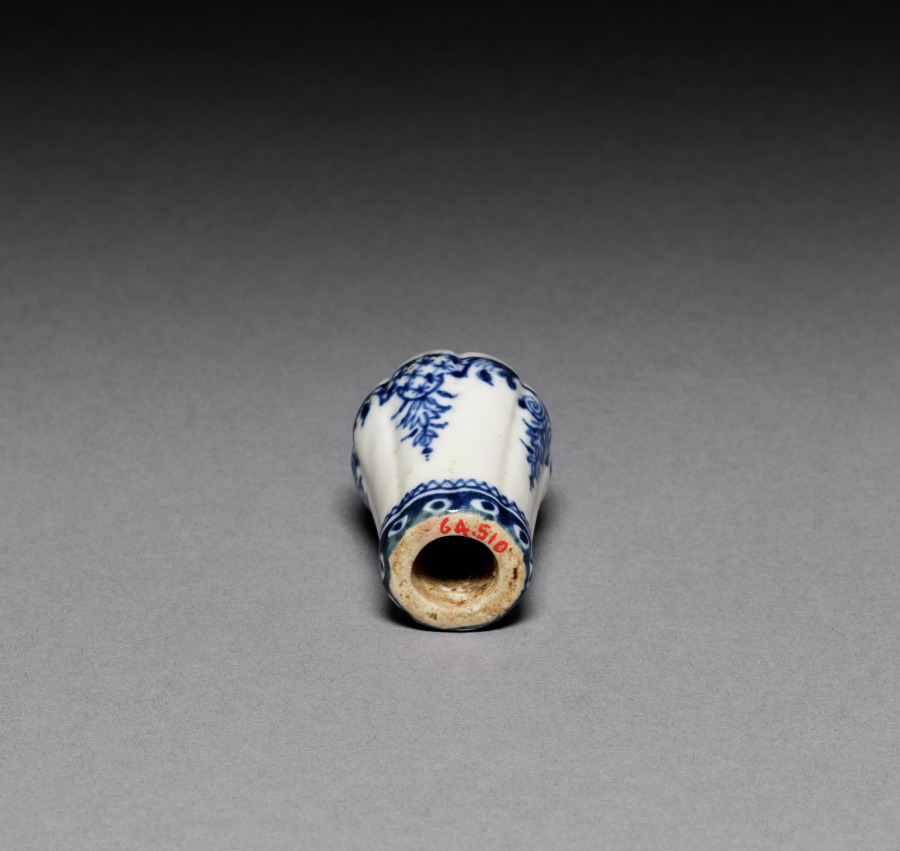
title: Cane Handle (Poignée de canne)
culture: France, Saint Cloud, early 18th Century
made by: Saint Cloud Porcelain Factory (French)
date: c.1700–1720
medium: soft-paste porcelain with underglaze blue decoration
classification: Ceramic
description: With its ribbing and underglaze blue decoration in the form of draping blue garlands, this porcelain handle was likely among the first to have been produced at the Saint-Cloud Porcelain Factory. Though Saint-Cloud may have been the first to produce porcelain cane handles as fashionable accessories, their popularity meant that they were soon produced at a variety of other French factories during the first half of the 1700s.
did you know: Canes, or sticks, were popular fashion accessories for aristocratic men, women, and children in 18th-century France.